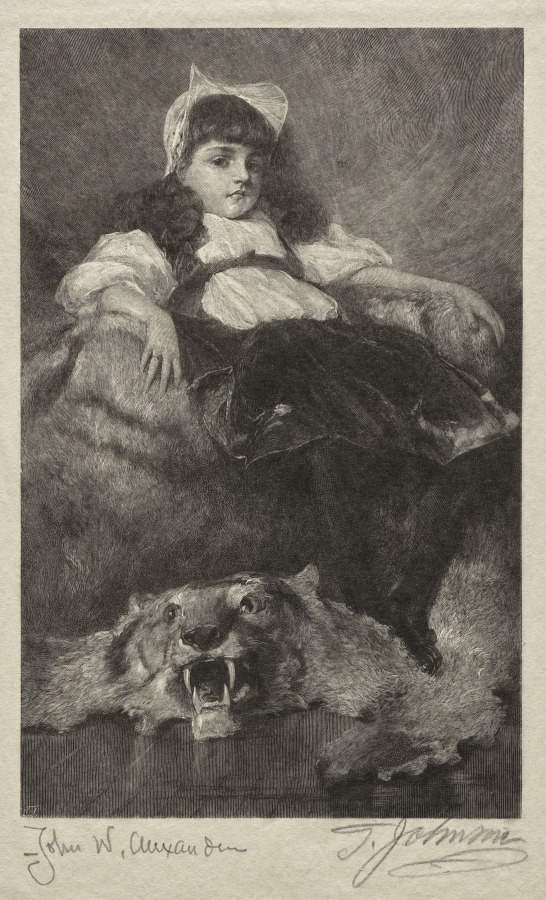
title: Portrait of a Child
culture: America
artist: Thomas George Johnson (American, 1844–1904)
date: c. 1887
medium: wood engraving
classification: Print